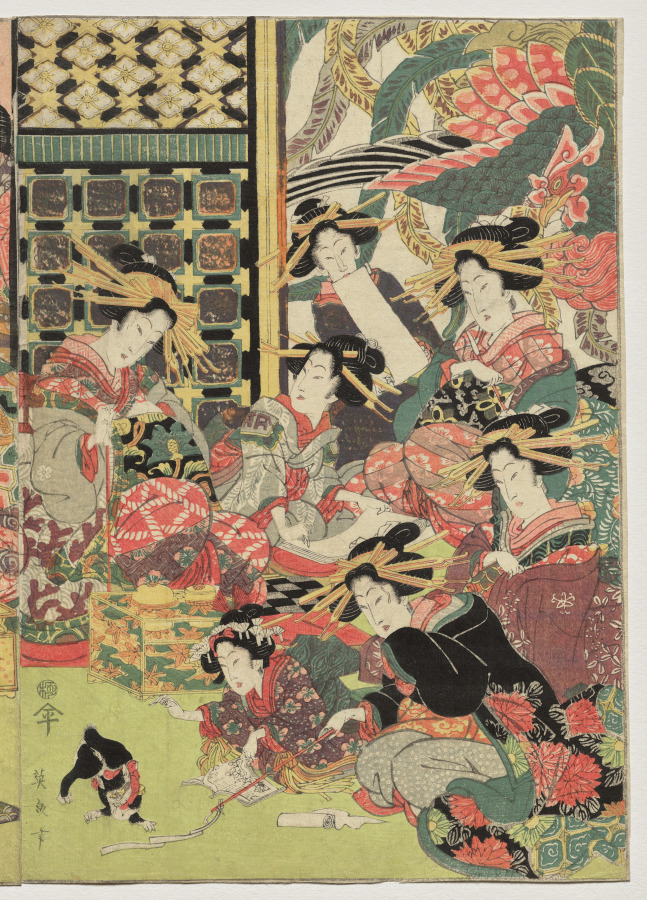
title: A Picture of the Viewing in the Pleasure Quarters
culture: Japan, Edo period (1615–1868)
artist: Kikukawa Eizan (Japanese, 1787–1867)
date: 1810s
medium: color woodblock print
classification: Print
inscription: Signature: Keisai Eisen hitsu Publisher: Omiya Heihachi (Hei) Seal: kiwame